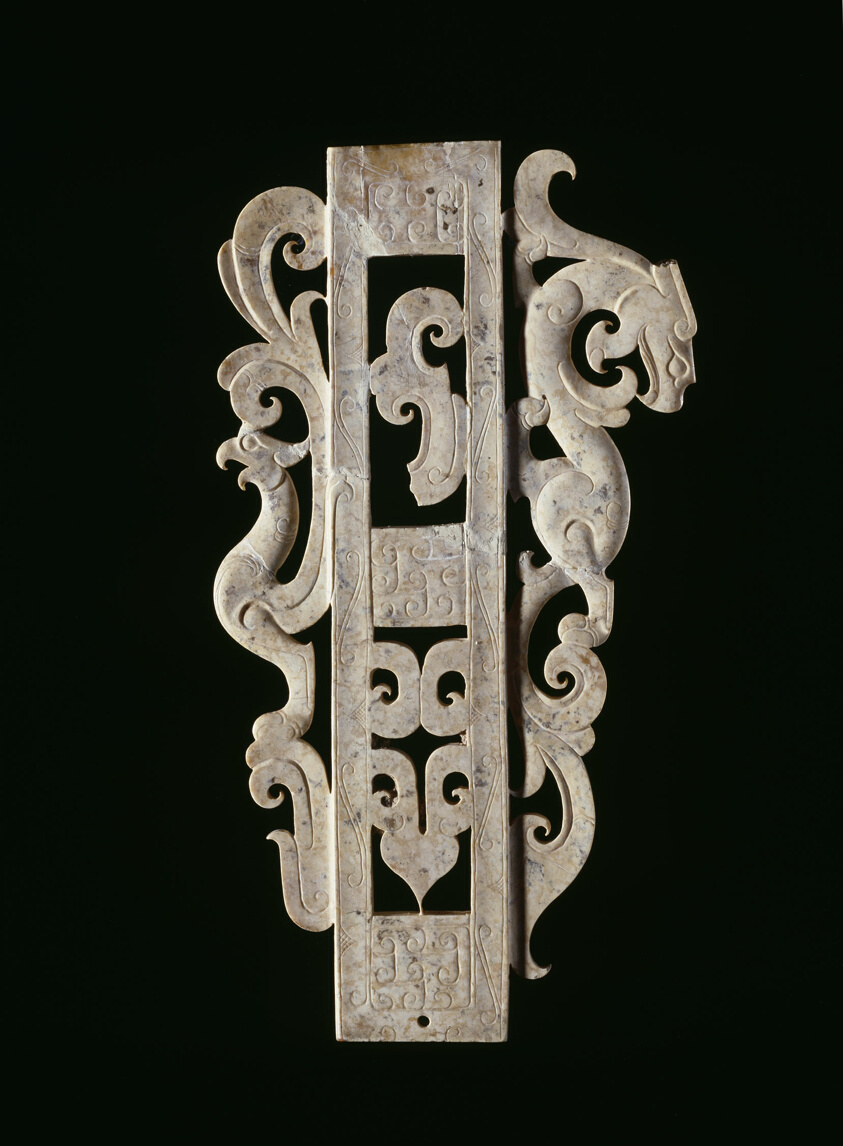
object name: Religious/Ritual Object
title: Sheath with Bird and Feline or Dragon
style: Chinese (culture or style)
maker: China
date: Warring States period to early Western Han dynasty, 3rd/2nd century B.C.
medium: Jade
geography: China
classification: weapon; asian art; ritual objects